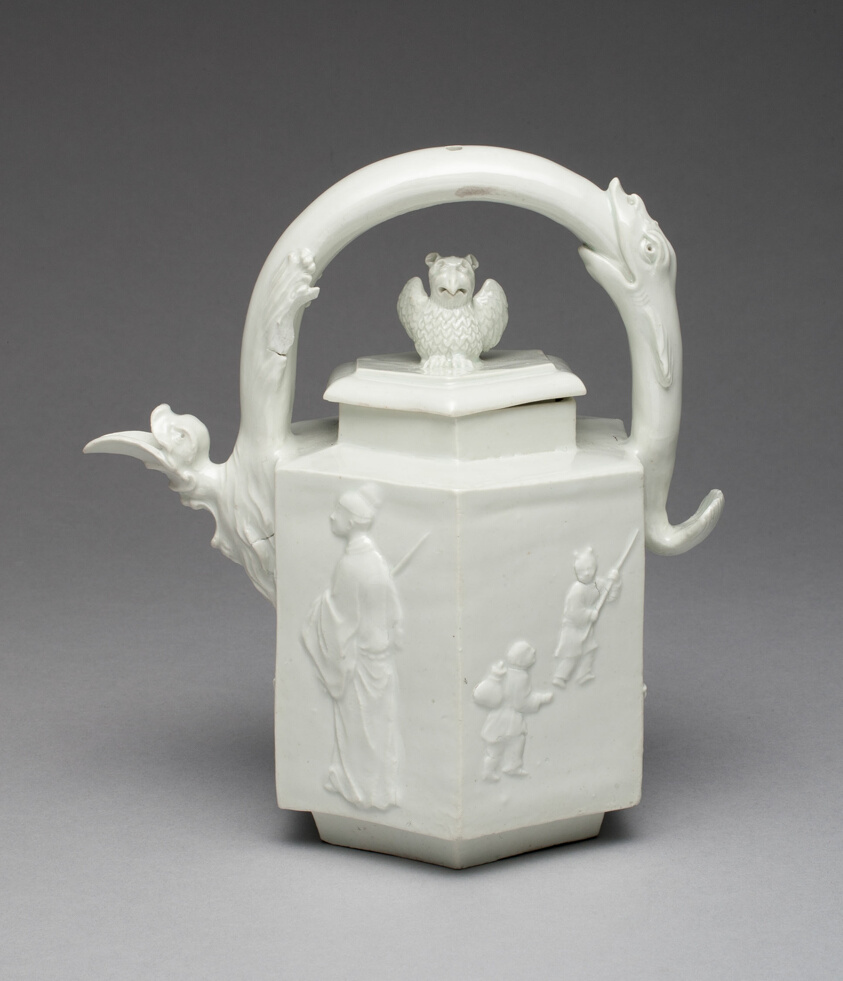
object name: Ceramics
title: Teapot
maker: Du Paquier Porcelain Manufactory (Austrian, 1718-1744)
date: c. 1720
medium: Hard-paste porcelain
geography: Vienna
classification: teapot; teaware; ceramics; porcelain; european decorative arts